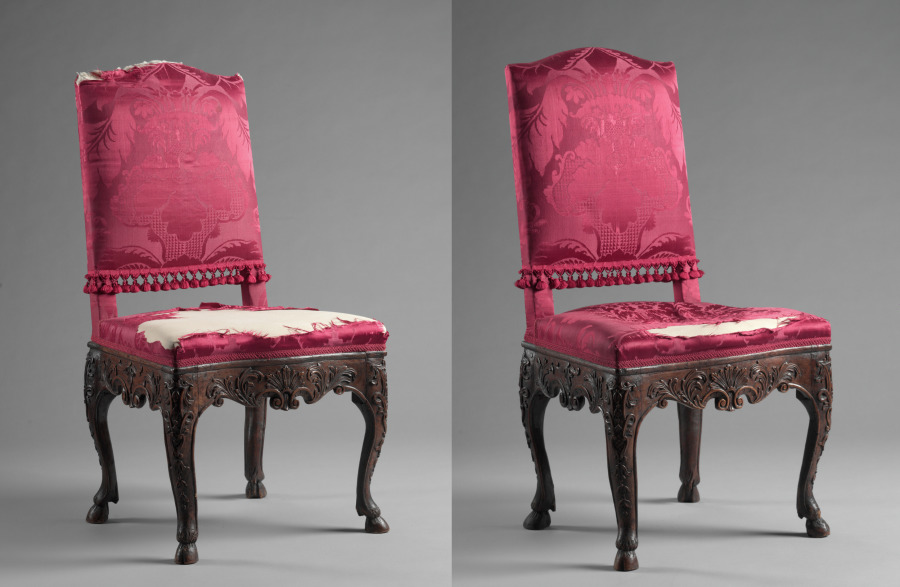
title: Pair of Side Chairs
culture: Germany, Belgium, or the Netherlands, early 18th century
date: early 1700s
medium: walnut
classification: Furniture and woodwork